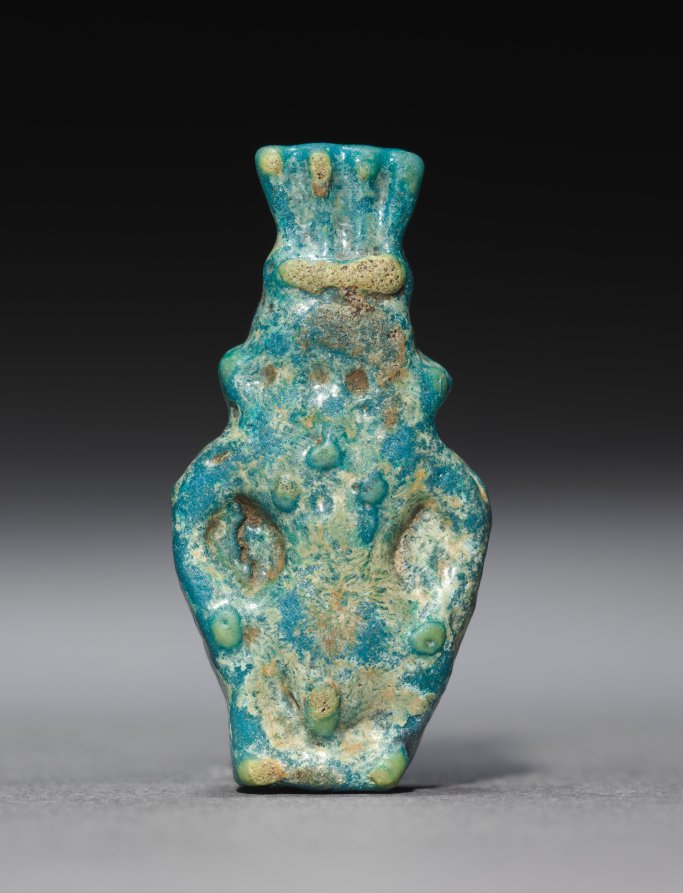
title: Amulet of Bes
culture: Egypt, Greco-Roman period (332 BCE–395 CE), Roman empire (30 BCE–395 CE)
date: 30 BCE–395 CE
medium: polychrome faience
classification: Amulets